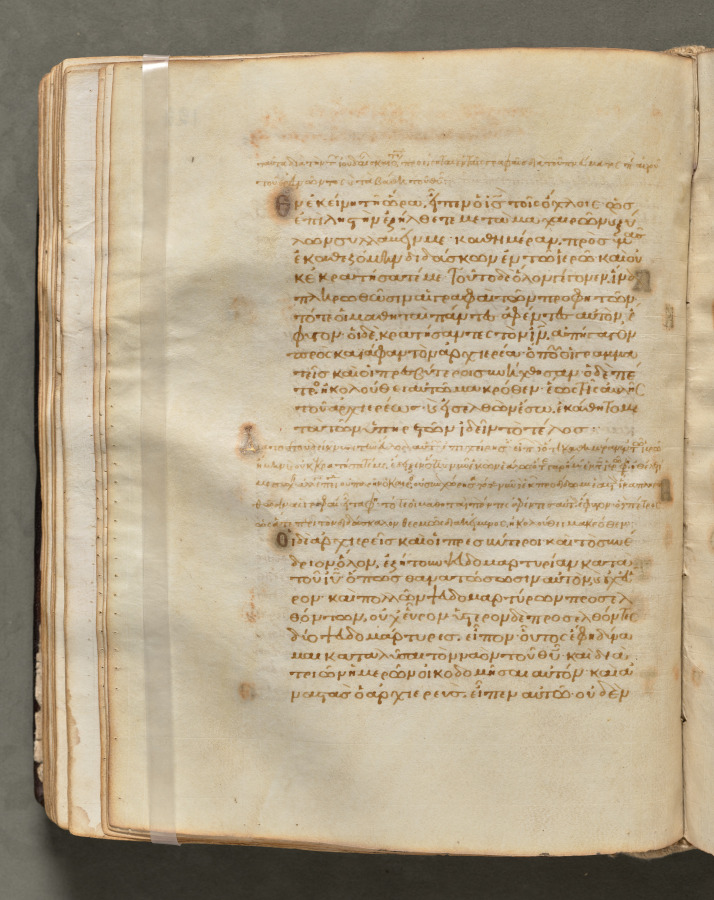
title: Text, folio 120 (verso), from a Gospel Book with Commentaries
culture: Byzantium, Constantinople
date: c. 1000–1100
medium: ink, tempera, and gold on vellum; leather binding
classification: Bound Volume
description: Each of the four gospels in this book opens on a page with brilliantly illuminated borders depicting the author of the text as well as birds-principally peacocks, symbols of the immortality of the soul-and fountains, representing the fountain of life and the salvation of the soul. This volume consists of 428 leaves with texts in Greek. Its level of sophistication suggests that it was probably written and decorated in a monastery in Constantinople.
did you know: Gospel Books were carried in procession through Byzantine churches.